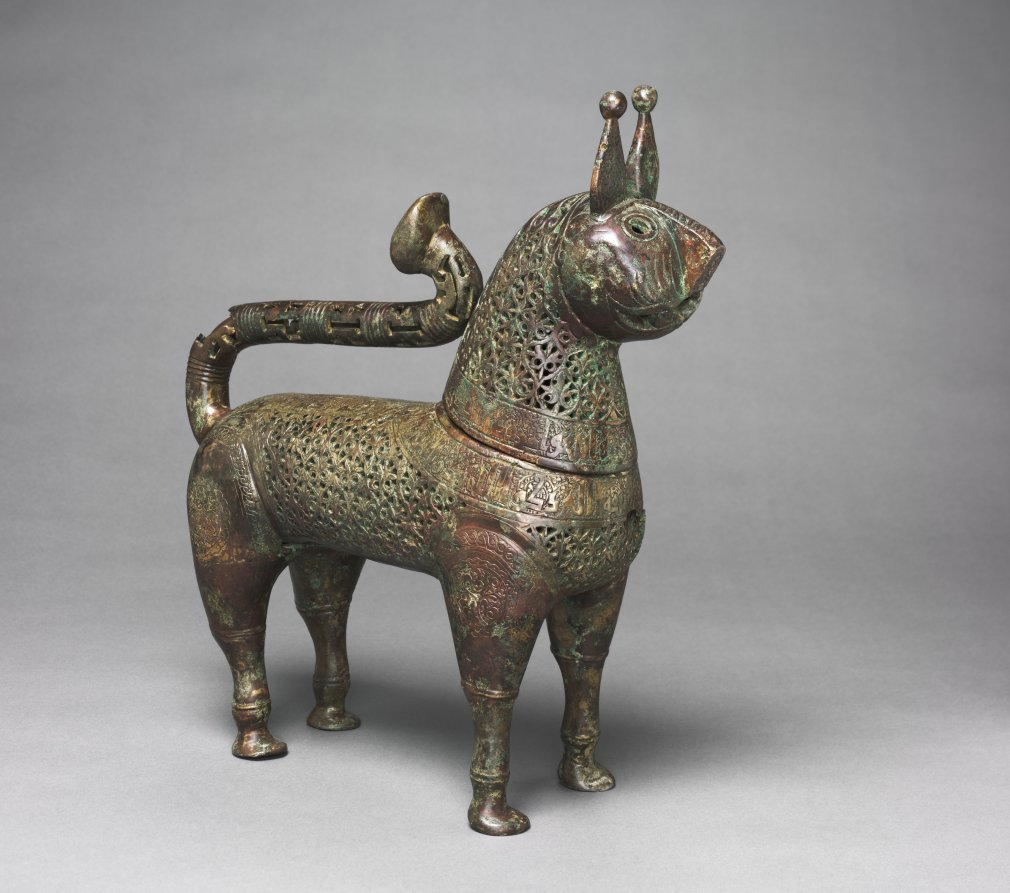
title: Feline Incense Burner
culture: Iran, Khurasan, Seljuq period of Iran (1037–1194)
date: 1150–1200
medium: Copper alloy, cast, engraved, chased, and pierced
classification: Metalwork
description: In Iran during the 1000s and 1100s, vessels in the shape of animals gained popularity, especially as incense burners. Felines were favored in Persian art and this piece may represent a caracal, a type of lynx. The head of the creature was cast separately and is removable to fill its body with hot coals and incense. Qur’anic verses on the neck and spine remind worshippers to set work aside, attend prayer, and then disperse to seek God’s bounty. The diffusion of perfumed smoke through the burner’s pierced palmette design may have served as a sensorial reminder of this teaching.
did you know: Arabic inscriptions in Kufic script against a background of scrolling arabesques run along the back and neck of the feline form.